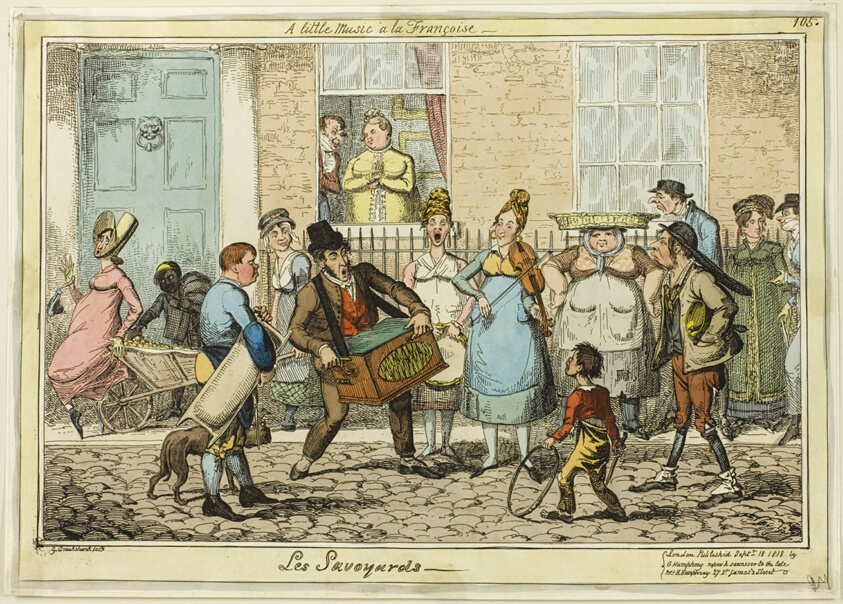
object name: Print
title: The Savoyards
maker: George Cruikshank (English, 1792-1878); published by George Humphrey (English, c. 1773-1831)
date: published September 18, 1818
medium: Hand-colored etching on paper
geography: England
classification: etching; print; prints and drawing